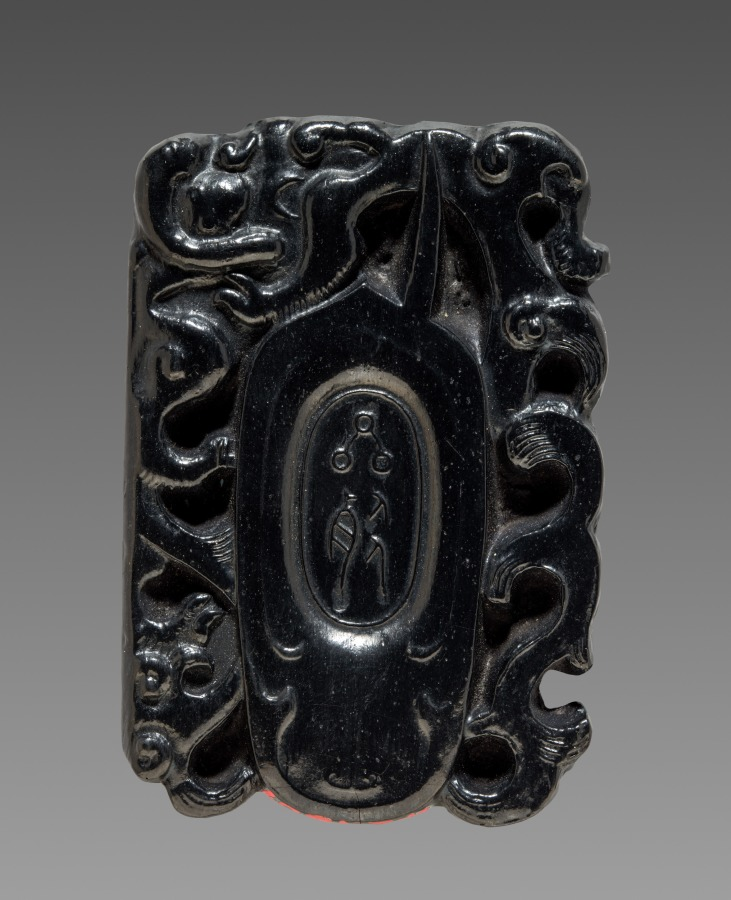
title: Ink Cake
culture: China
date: 1800s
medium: ink cake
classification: Miscellaneous